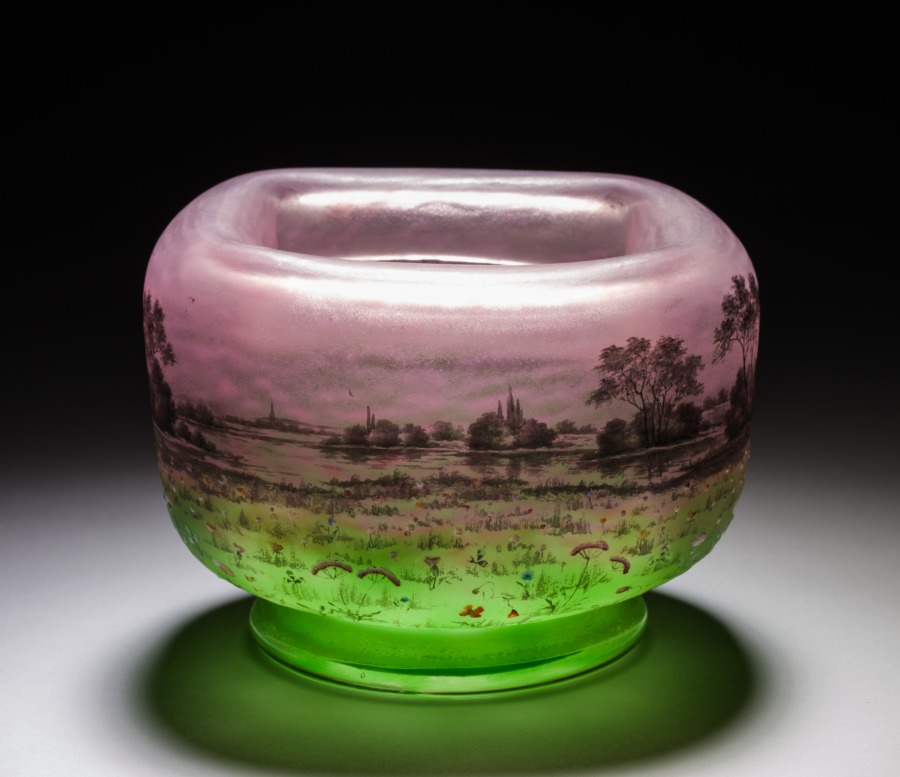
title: Bowl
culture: France, Nancy, late 19th-early 20th Century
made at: Daum Brothers (French)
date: late 1800s - early 1900s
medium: glass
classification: Glass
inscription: signed on bottom: Daum Nancy.